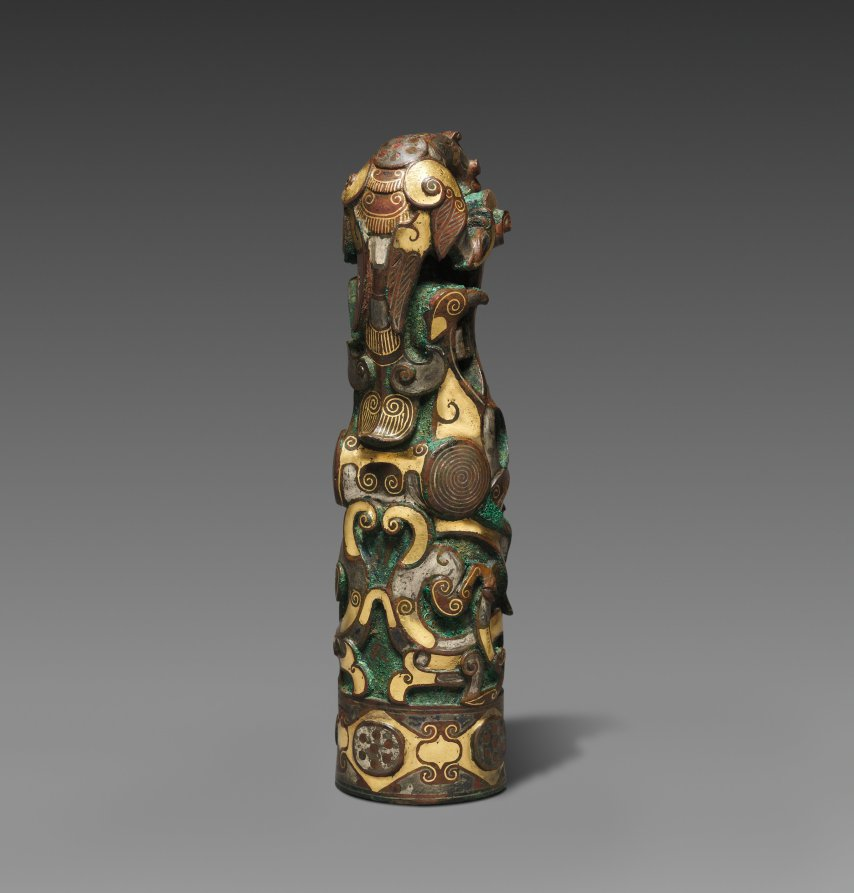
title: Finial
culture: China, Henan province, Jincun, Warring States period (475–221 BCE)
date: 475–221 BCE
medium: bronze inlaid with gold and silver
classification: Metalwork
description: Chariots and weapons were associated with hunting and warfare in the ancient world. Those bronze fittings with lavish inlaid decoration were status symbols of rulers and high-ranking officials. This finial combines extravagance and ferocious beauty to reveal the aesthetics of the time. The birds with hooked beaks are above the intertwined serpent-dragons. Such artistic conception emphasizes the power of the bird in combat. Every facet of this finial is exquisitely crafted to give full play to the inlaid decoration.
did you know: This finial is made to be placed on the top of a pole or staff.